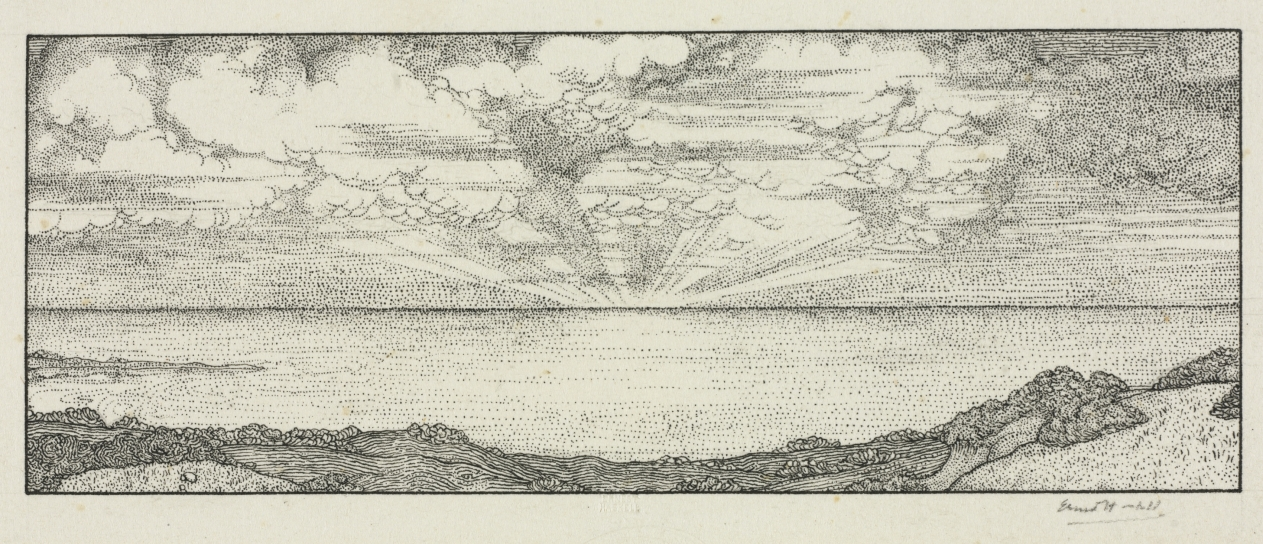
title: Sunrise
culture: America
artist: Ernest Haskell (American, 1876–1925)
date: c. 1900–1925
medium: pen and ink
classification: Drawing